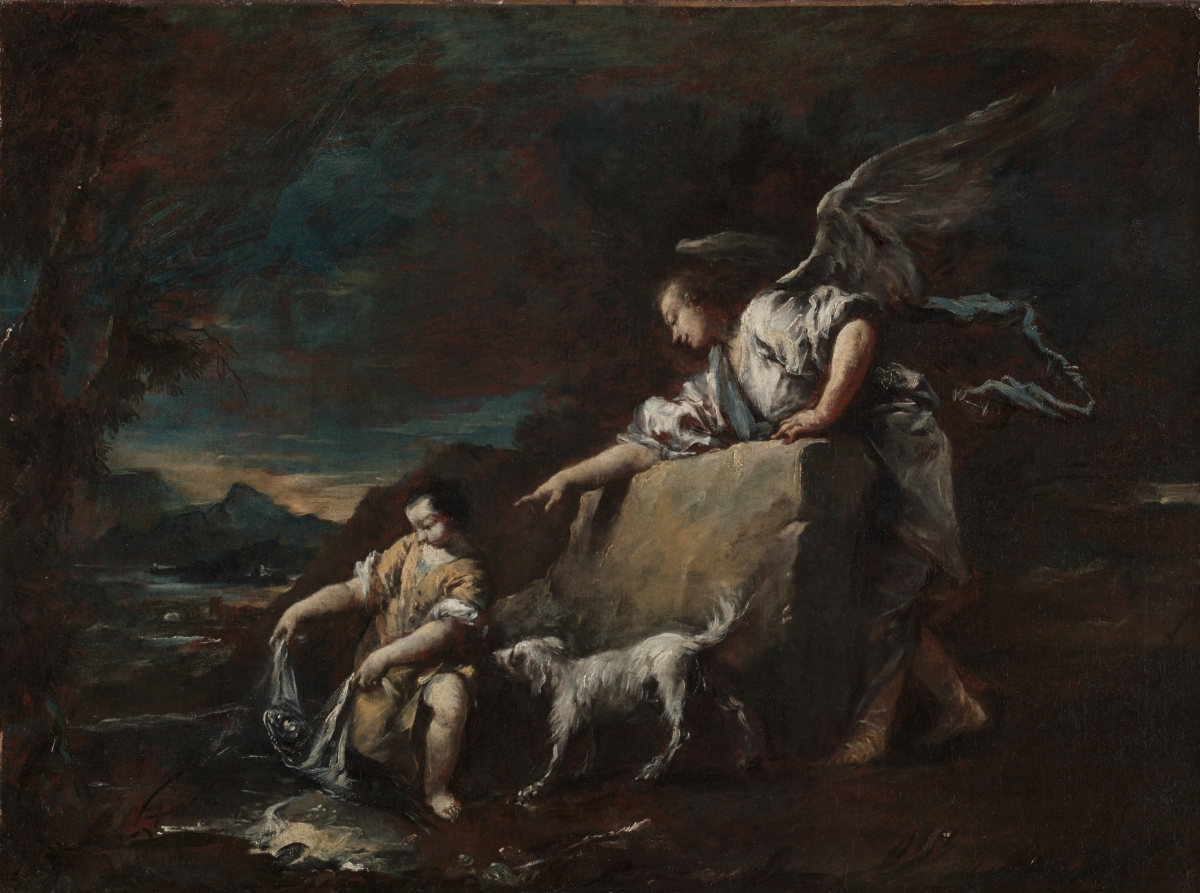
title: Tobias and the Angel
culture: Italy, 18th century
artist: Francesco Guardi (Italian, 1712–1793)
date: 1750s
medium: oil on canvas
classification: Painting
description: This series of paintings predominantly tells the Old Testament story of Abraham and Isaac, and each of the canvases treats the interaction of humans and angels. In three works, angels appear to Abraham. However, the narrative of Tobias and the Angel comes from an entirely different book of the Bible. The blind Tobit sends his son Tobias off to collect a sum of money in the distant town of Media, with the angel Raphael accompanying him in disguise as a human. This particular work depicts Raphael overseeing Tobias catching a fish, which would later be used to cure his father's blindness.